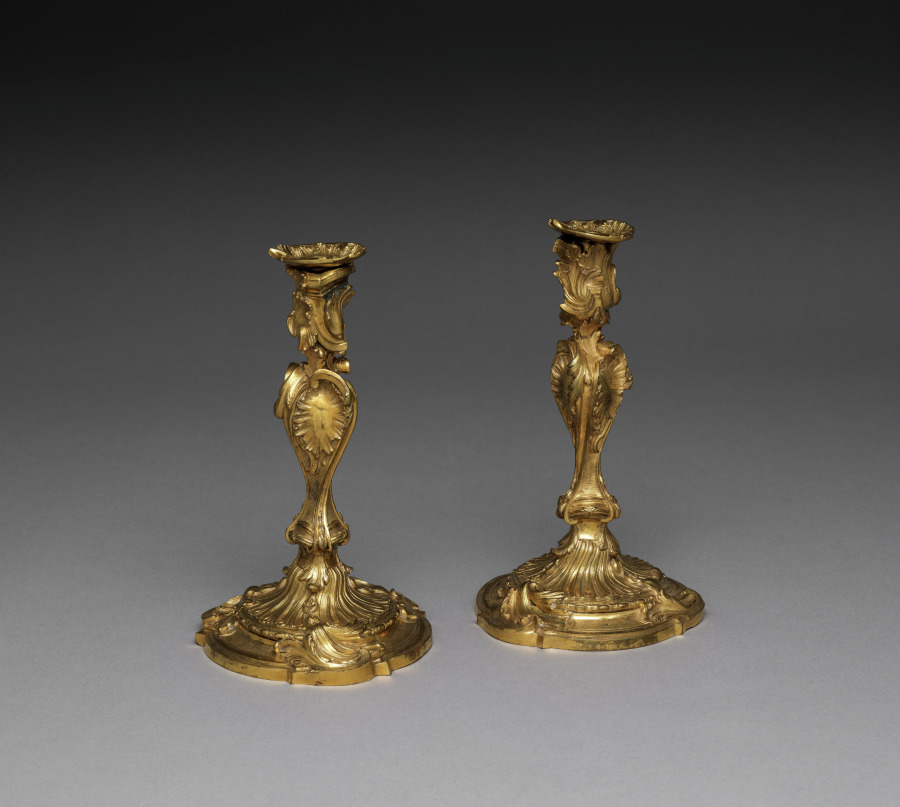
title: Candlesticks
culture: France, 18th century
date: 1745–1749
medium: gilt metal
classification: Furniture and woodwork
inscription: Stamped on side of base: Crowned "C".